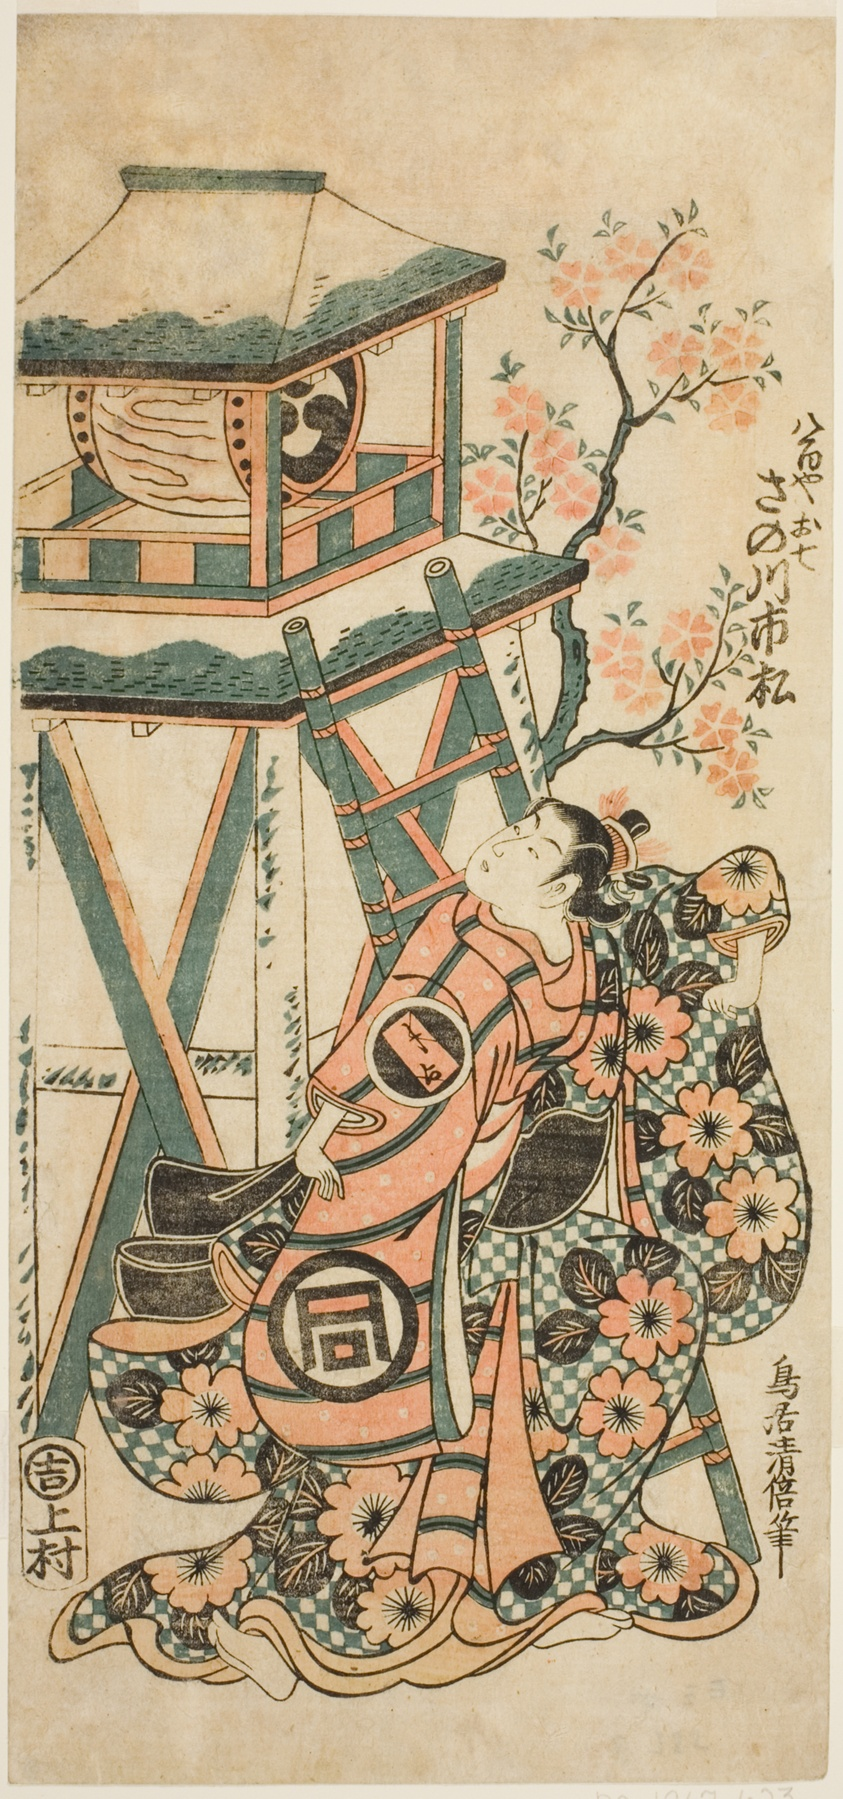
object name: Print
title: The Actor Sanogawa Ichimatsu I as Yaoya Oshichi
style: Japanese (culture or style)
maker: Torii Kiyomasu II (Japanese, 1706 (?)–1763 (?))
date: c. 1751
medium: Color woodblock print; hosoban, benizuri-e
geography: Japan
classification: woodblock print; print; asian art